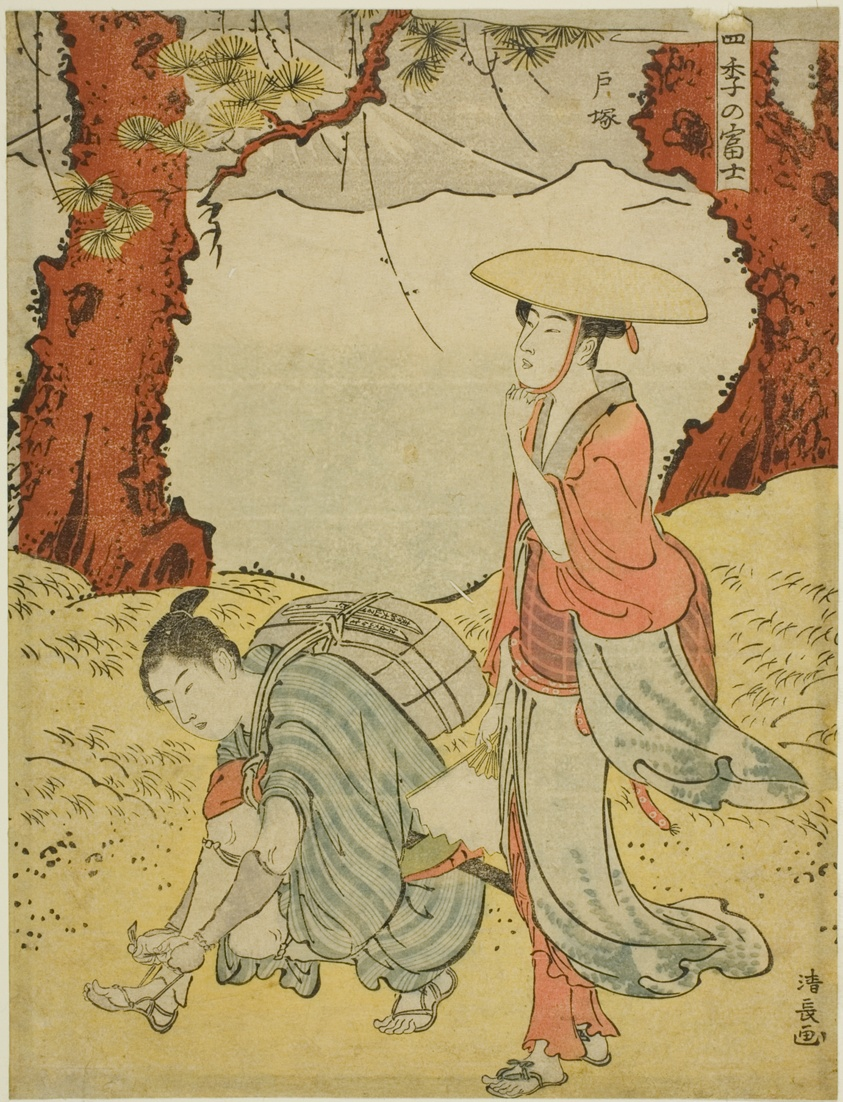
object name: Print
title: Totsuka, from the series "Mount Fuji in the Four Seasons (Shiki no Fuji)"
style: Japanese (culture or style)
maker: Torii Kiyonaga (Japanese, 1752-1815)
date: c. 1785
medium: Color woodblock print; chuban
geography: Japan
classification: print; asian art